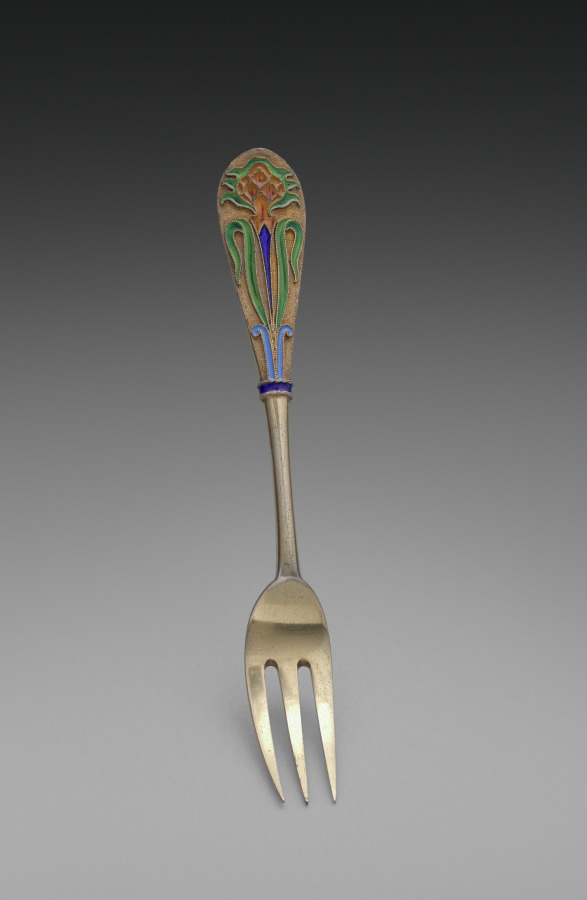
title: Cake Fork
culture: Russia, St. Petersburg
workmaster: attributed to Feodor Ivanovich Rückert (Russian, 1840–1917)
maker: House of Fabergé (Russian, 1842–1918)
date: 1887–96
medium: silver gilt, opaque cloisonné enamel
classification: Miscellaneous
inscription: 84, St. George [assay mark for Moscow, 1882-1896]; C. Fabergé (in Cyrillic); double-headed eagle [imperial warrant]; 11494 scratched.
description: Fabergé’s craftsmen in Moscow, especially under the watchful eye of workmaster Feodor Rückert, became known for their work in the pan-Slavic or neo-Russian style, hearkening back to 17th-century motifs of Russian folk art. Often on rather conventional shapes, Rückert and his silversmiths created an explosion of color, achieved through the historic technique of cloisonné enamel in which tiny metal lines are soldered to the surface then filled with glass powders in various colors and fired to create a high gloss finish. The result is a spectacular evocation of the 17th-century originals. Far from mere copies, however, Rückert's designs, such as this tea service, employ naturalistic or abstract motifs in a thoroughly modern adaptation of a remarkable earlier period of Russian art and decoration.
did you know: This cake fork is part of a larger tea service.